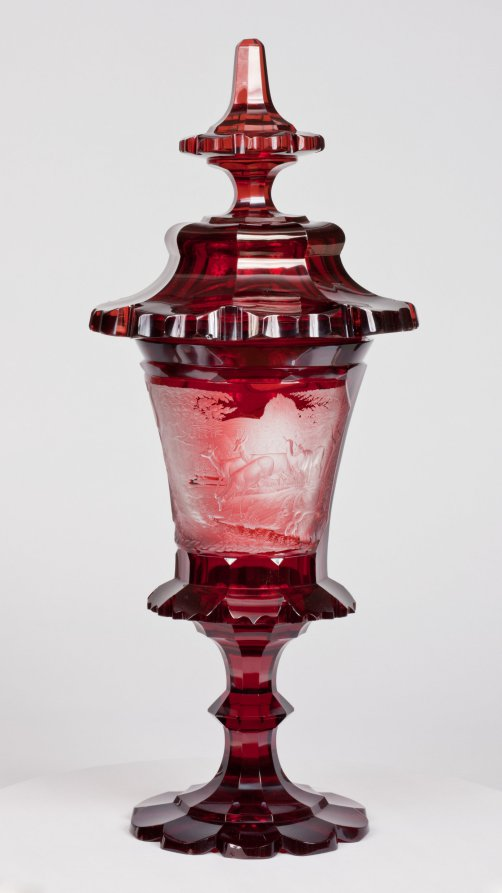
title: Covered Cup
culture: Bohemia, 19th century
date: mid-1800s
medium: ruby glass with engraved decoration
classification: Glass